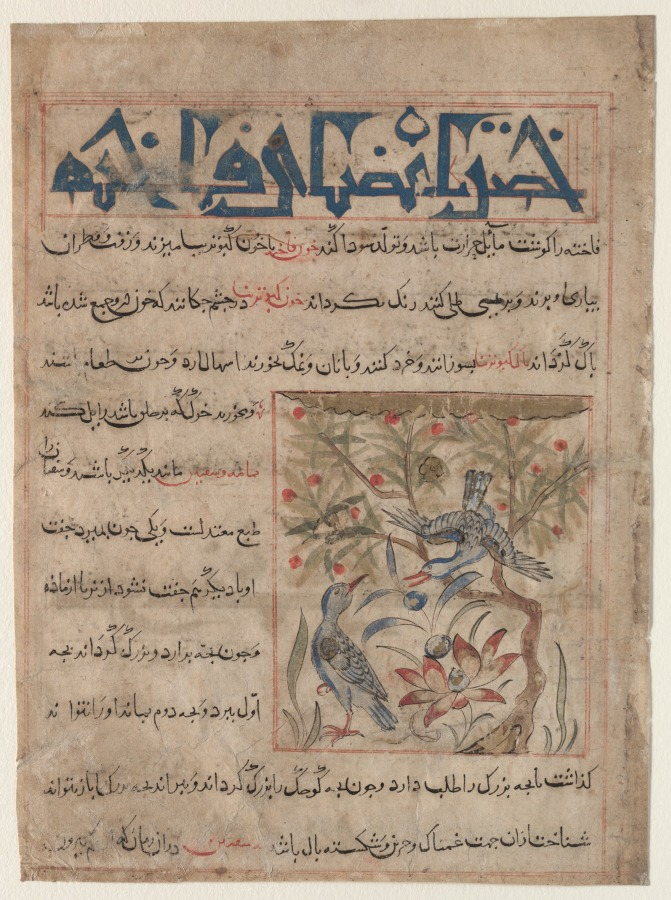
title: Qualities of Ringdoves (recto); On the Benefits of Quails (verso), from a Persian Manafi‘ al-Hayawan (The Benefits of Animals) of Abu Said Ubaid-Allah ibn Jibrail ibn Bakhtishu (died 1058–68)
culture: Iran, Maragah, Ilkhanid period (1256–1353)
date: c. 1300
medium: opaque watercolor, ink, and gold on paper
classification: Manuscript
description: This small illustration of ringdoves incorporates the influence of Chinese naturalism in the drawing of the tree trunk and lotus blossom. In contrast, the reverse side is more traditional. The innovative page layouts feature cursive nashki script with bold angular kufic script headings. Derived from Aristotelian sources, this treatise deals with the physical characteristics and organs of animals. The text was translated into Persian from Arabic for the Ilkhanid ruler Ghazan Khan (reigned 1295–1304). Roughly a dozen pages from this long-lost manuscript are known. It is dated by comparison with a similar manuscript made at Maragha, near Tabriz, in 1297 or 1299.